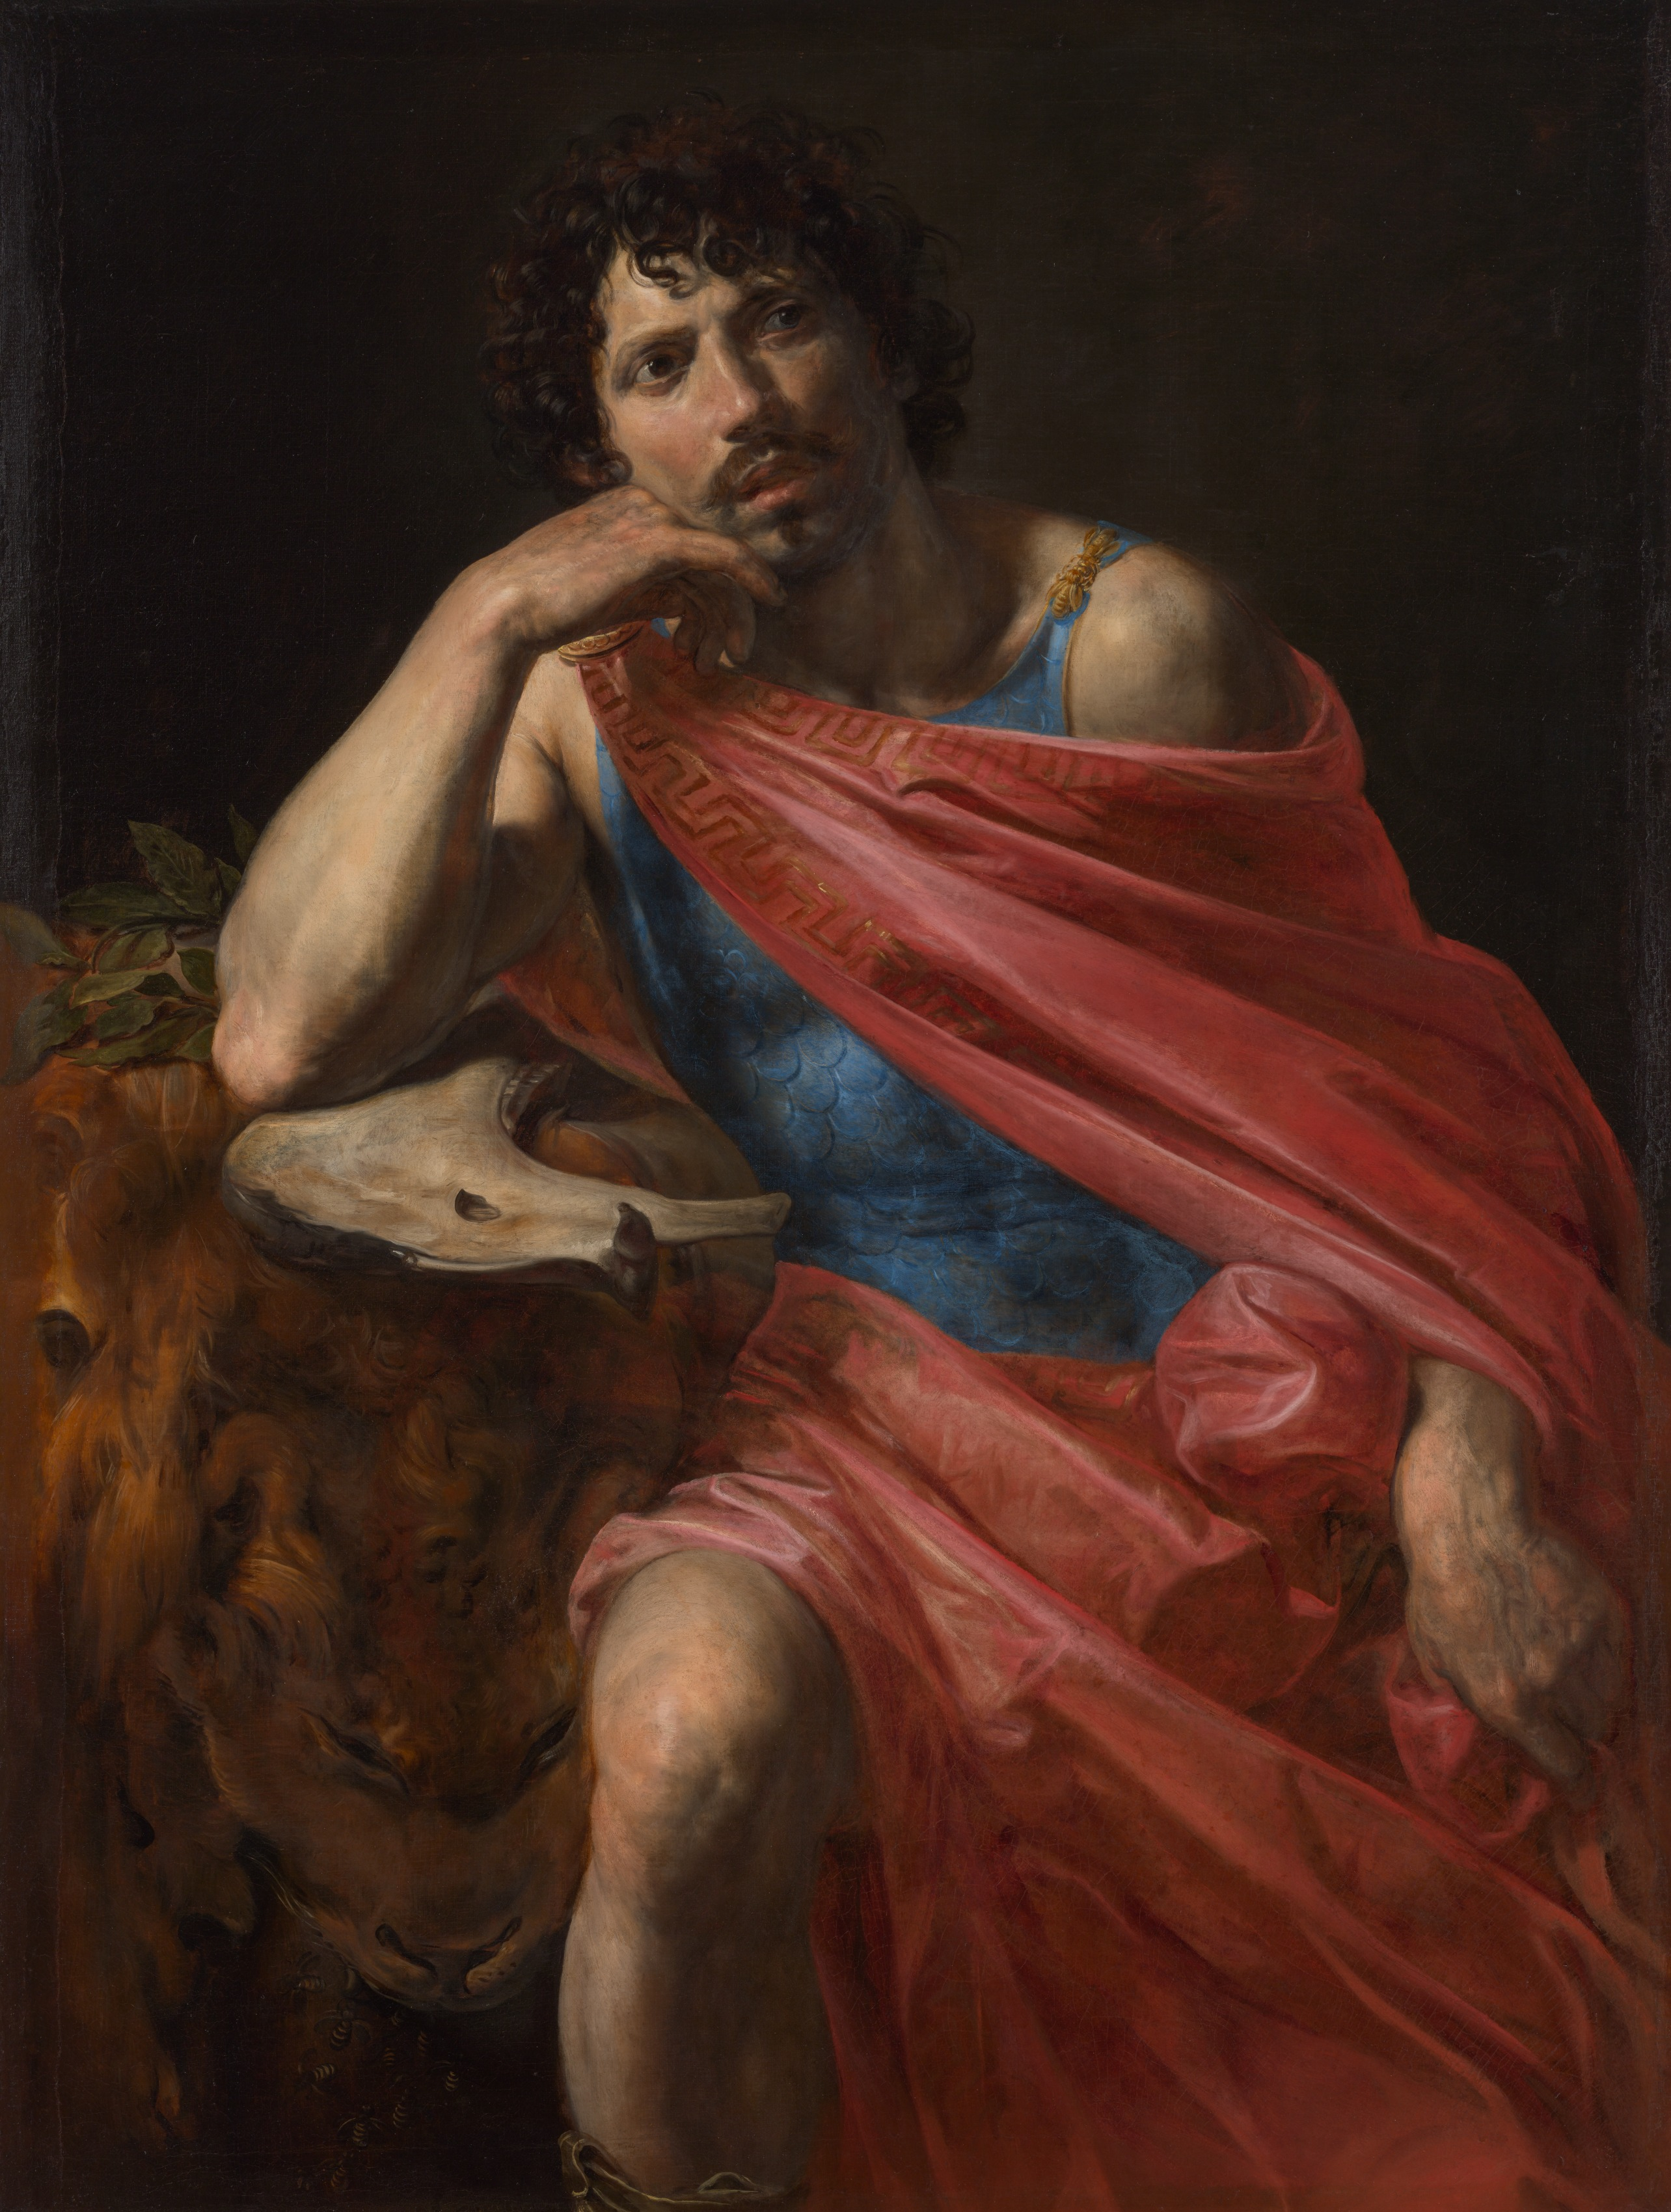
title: Samson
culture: France, 17th century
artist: Valentin de Boulogne (French, 1591–1632)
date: 1630–31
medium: oil on canvas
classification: Painting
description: The Old Testament hero Samson rests his head on his hand in a pensive, even melancholic pose. Objects on the table recall two of his heroic deeds: he killed a lion with his bare hands, and liberated the Israelites by slaughtering a thousand Philistines with a donkey’s jawbone. Samson’s cuirass, or breastplate, is joined at the shoulder by a clasp in the form of two bees—the emblem of the Barberini family, who commissioned the painting around 1630. In 1627, the Barberini had engaged Valentin to paint another biblical hero, David victorious with the head of Goliath; the canvas depicting Samson was designed to be its pendant.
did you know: The figure of Samson was likely a self-portrait of the artist.